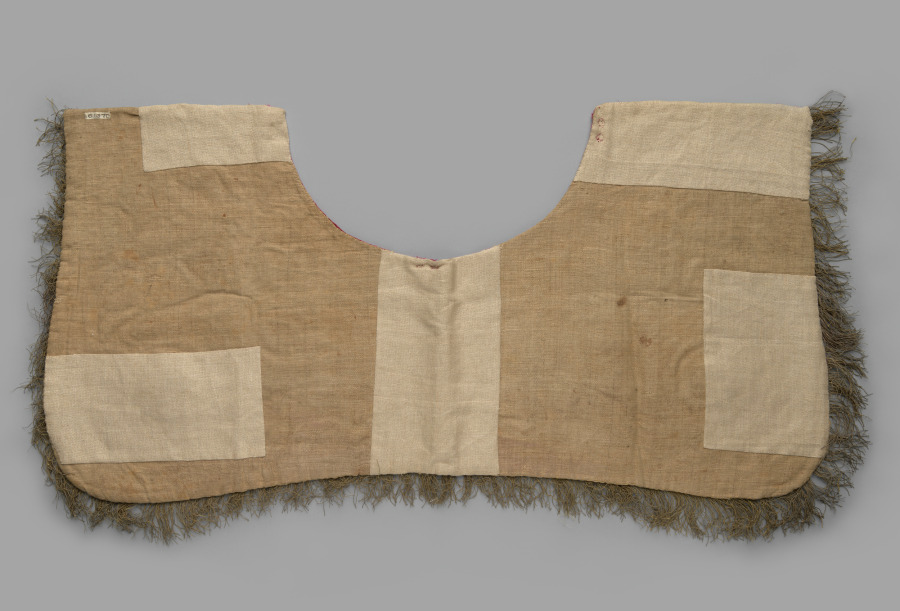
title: Gold Embroidered Saddle Ornament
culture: Spain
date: 1700s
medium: embroidery; gold metallic thread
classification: Embroidery